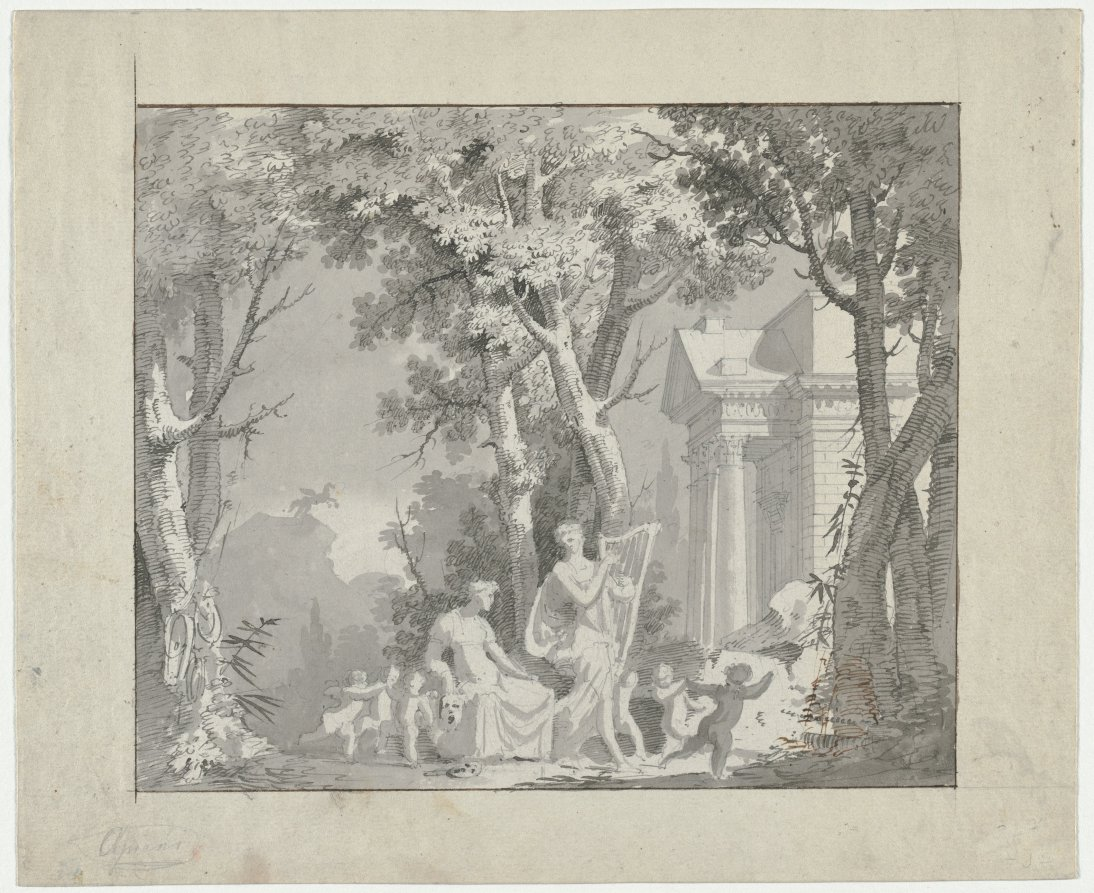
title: Classical Scene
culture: Portugal, 18th century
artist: circle of Francisco Vieira (Portuguese, 1765–1805)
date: 1775–1800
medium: pen and brown and gray ink with gray wash over pencil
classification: Drawing